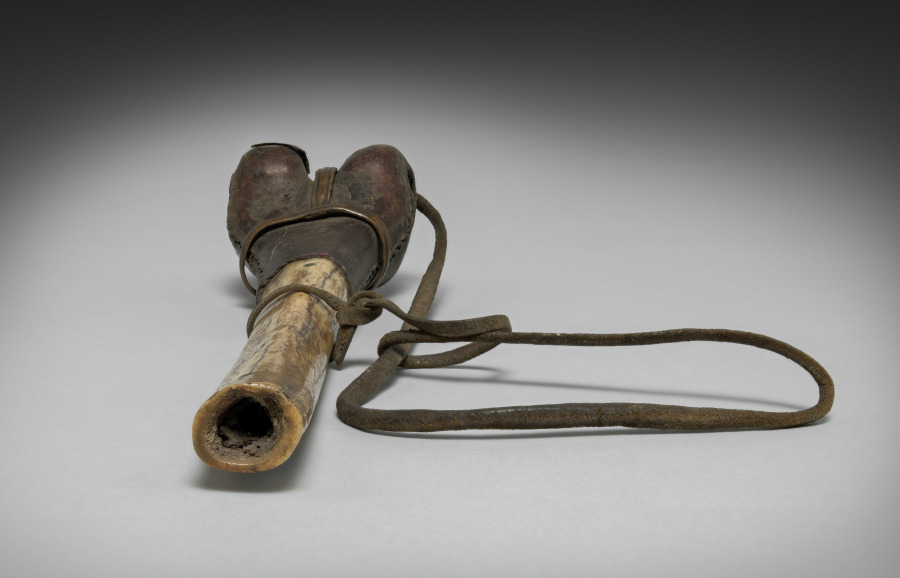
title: Thighbone Trumpet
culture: Tibet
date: c. 1800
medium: bone, leather, and copper alloy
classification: Musical Instrument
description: Blown during tantric Buddhist rituals, this ritual instrument is made of bone to remind practitioners of the impermanence of the corporeal body. The horn is sounded to clear away obstacles to enlightenment, conceived as enemies in battle.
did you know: Tantric ritual trumpets are traditionally made from human femurs, but now they can be made from plastic, metal, or other materials.